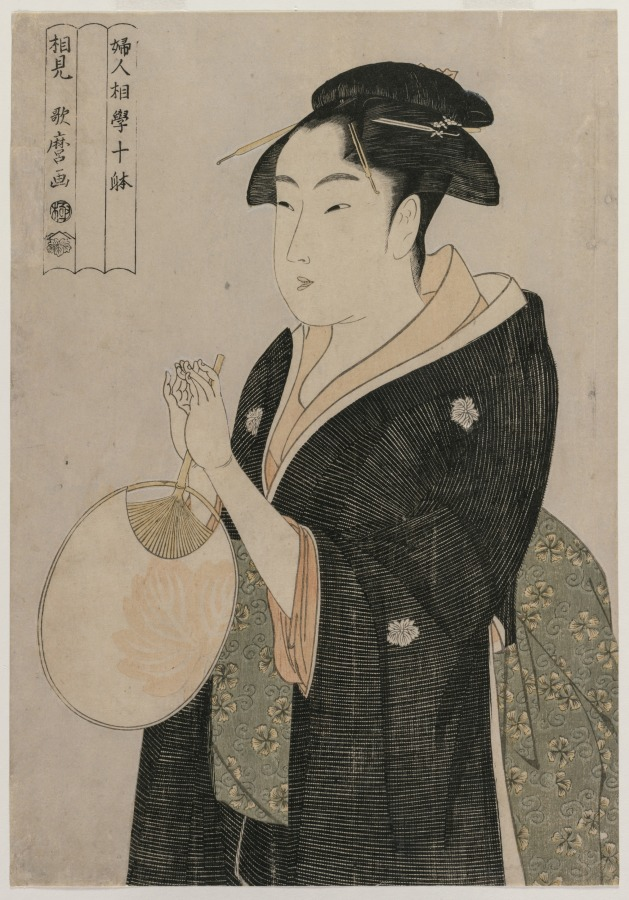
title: Woman Holding a Fan (from the series Ten Aspects of the Physiognomy of Women)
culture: Japan, Edo period (1615–1868)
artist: Kitagawa Utamaro (Japanese, c. 1754–1806)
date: c. 1793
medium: color woodblock print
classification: Print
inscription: Signature: Sōmi Utamaro ga (Utamaro, the physiognomist).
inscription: Publisher: Tsutaya Jūzaburo (emblem). Censorship Seal: kiwame.